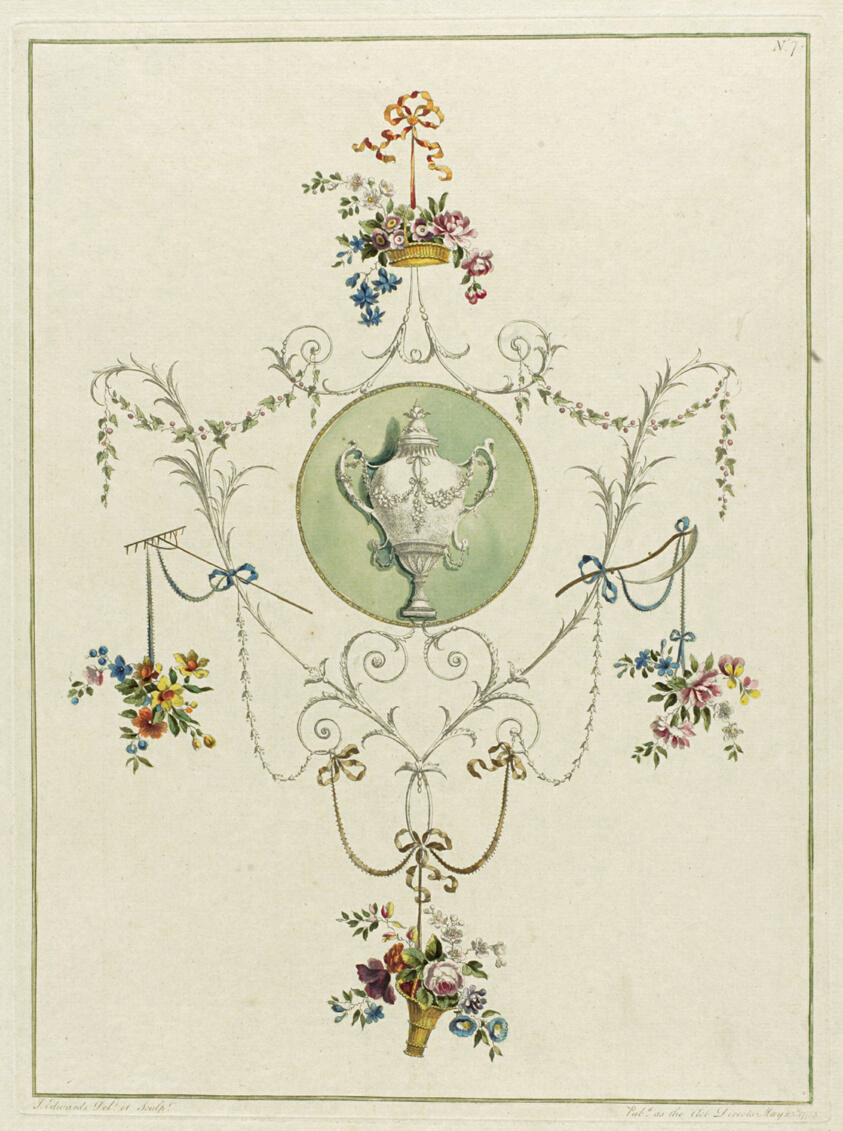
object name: Print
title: Decorative Floral Print, from A Collection of Flowers Drawn after Nature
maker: John Edwards (British, 18th and 19th century)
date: 1793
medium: Hand-colored etching on paper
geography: England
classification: etching; print; prints and drawing